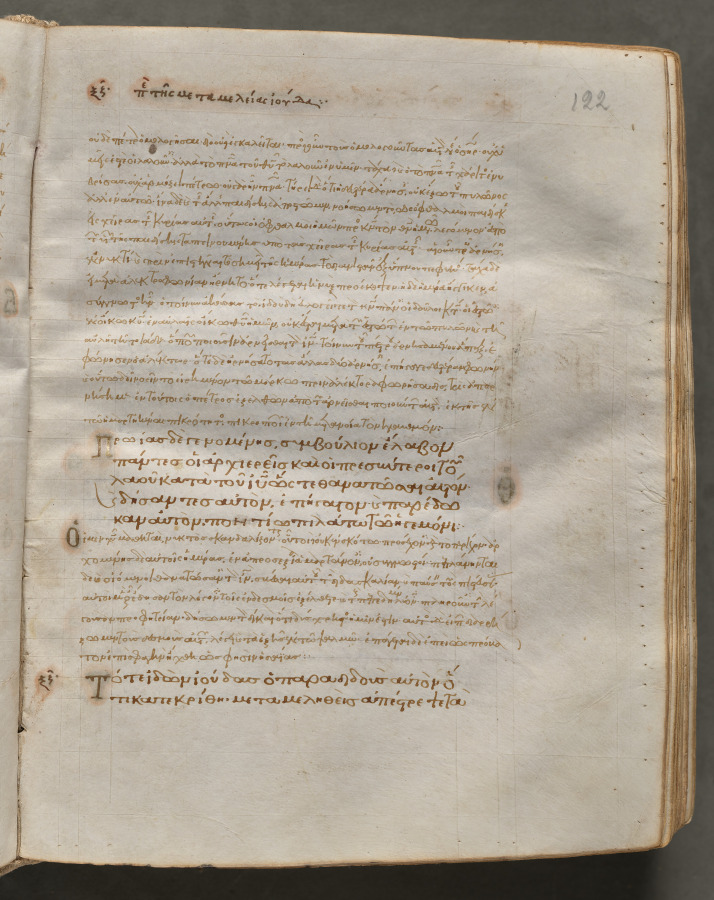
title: Text, folio 122 (recto), from a Gospel Book with Commentaries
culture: Byzantium, Constantinople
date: c. 1000–1100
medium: ink, tempera, and gold on vellum; leather binding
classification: Bound Volume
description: Each of the four gospels in this book opens on a page with brilliantly illuminated borders depicting the author of the text as well as birds-principally peacocks, symbols of the immortality of the soul-and fountains, representing the fountain of life and the salvation of the soul. This volume consists of 428 leaves with texts in Greek. Its level of sophistication suggests that it was probably written and decorated in a monastery in Constantinople.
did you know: Gospel Books were carried in procession through Byzantine churches.